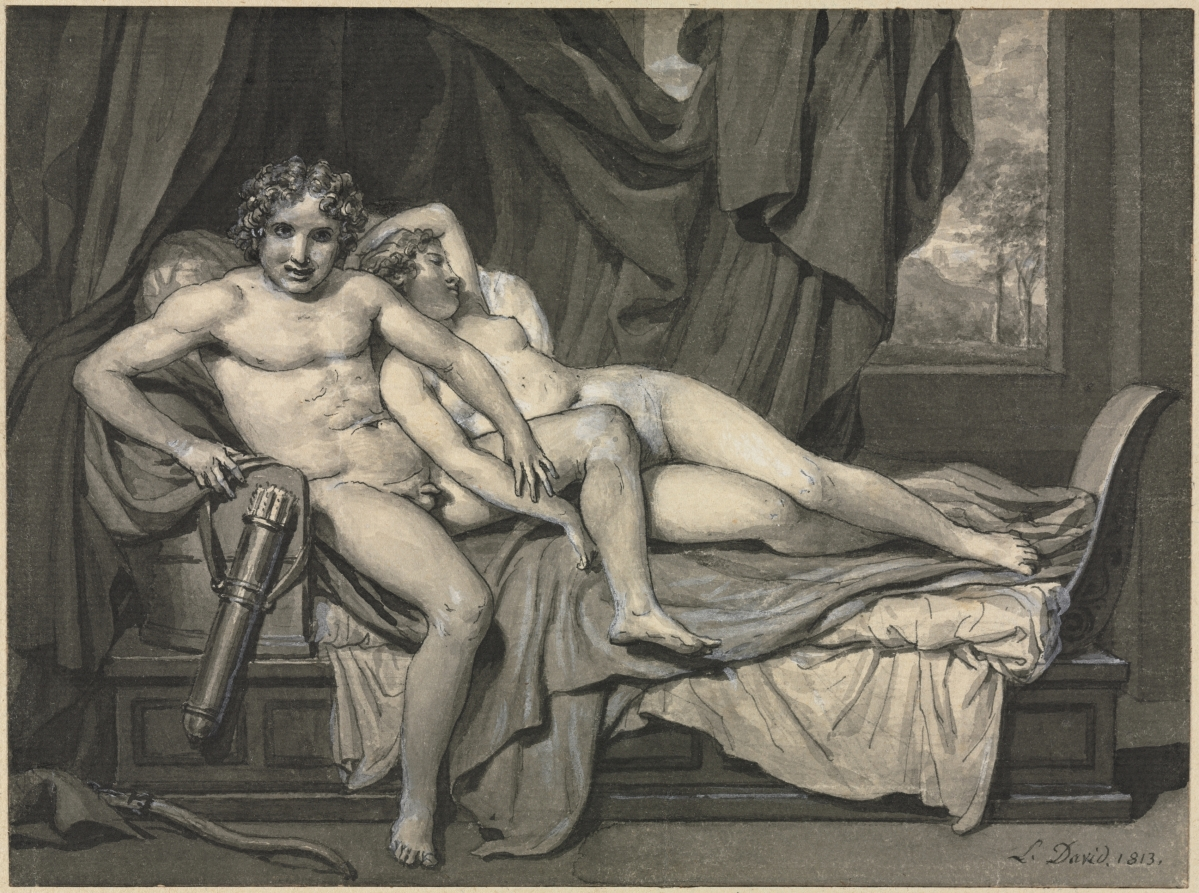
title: Cupid and Psyche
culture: France, 19th century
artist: Jacques-Louis David (French, 1748–1825)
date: 1813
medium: gray wash and pen and black ink with white paint and traces of black chalk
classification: Drawing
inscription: signed and dated, lower right: L. David 1813.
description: This drawing belongs to a group of preparatory studies for Jacques-Louis David's painting Cupid and Psyche, also in the Cleveland Museum of Art's collection. Here, David integrated looser charcoal sketches into a finished work in which his composition was fully established. Only minor details, such as Cupid's facial expression, were ultimately changed. In layers of diluted gray wash and outlines of black ink, David evoked the precise appearance of his final canvas using monochromatic media.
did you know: Scholars believe that this drawing was given by Jacques-Louis David to his pupil, the Comte de Forbin, to thank him for his continual devotion.